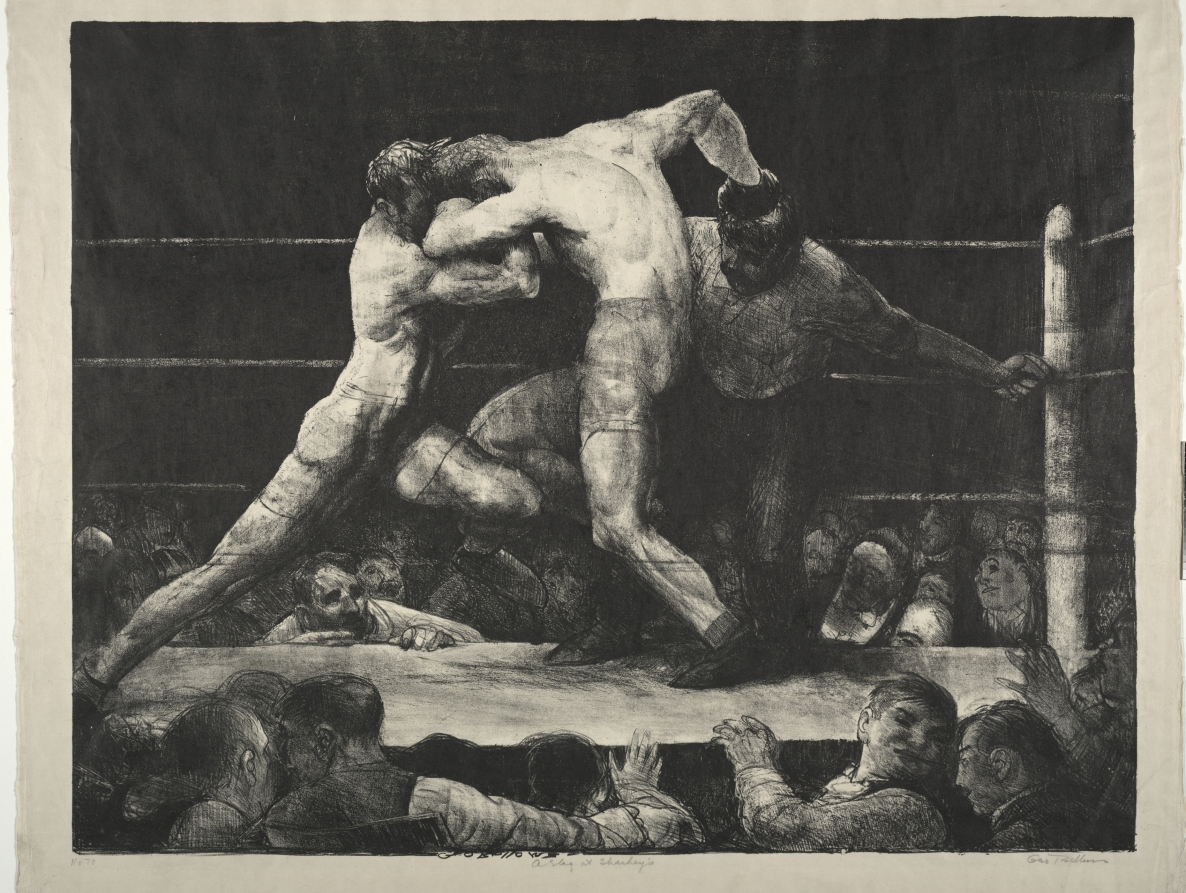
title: A Stag at Sharkey's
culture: America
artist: George Bellows (American, 1882–1925)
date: 1916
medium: lithograph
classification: Print